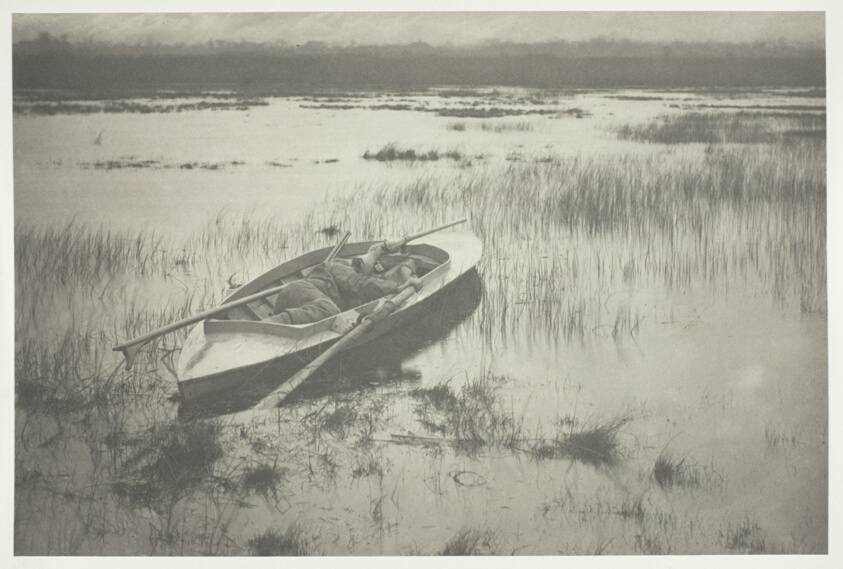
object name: Photograph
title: Gunner Working Up to Fowl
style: 19th century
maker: Peter Henry Emerson (English, born Cuba, 1856–1936)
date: 1886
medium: Platinum print, pl. XIX from the album "Life and Landscape on the Norfolk Broads" (1886)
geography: England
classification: platinum print; photographic process; photography; photograph